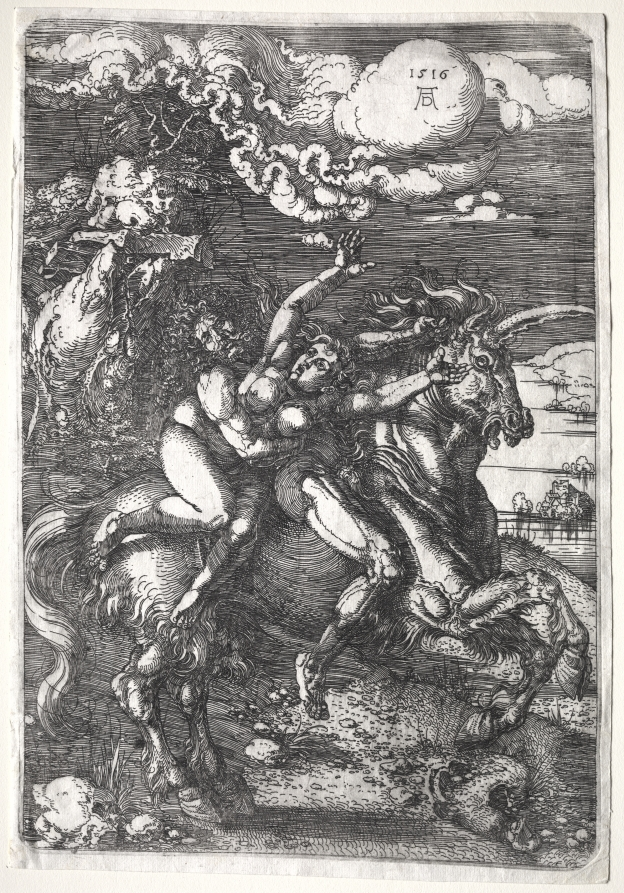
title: The Abduction on a Unicorn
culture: Germany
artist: Albrecht Dürer (German, 1471–1528)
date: 1516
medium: etching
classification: Print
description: The volatile mood of this etching starkly contrasts with the abduction scene in Dürer’s Sea Monster. Here, a woman struggles against her male captor as he carries her away on a menacing unicorn with a jagged horn and cloven hoofs. Although unicorns were generally associated with purity, medieval texts also identified the mythical creature as a symbol of evil or death. As with Dürer’s other puzzling scenes of women, scholars have attempted to identify these figures in relationship to classical mythology, in this instance Pluto and Proserpina. This characterization remains vague however; the ominous cloudy sky and savage nature of the event suggests far more sinister circumstances.